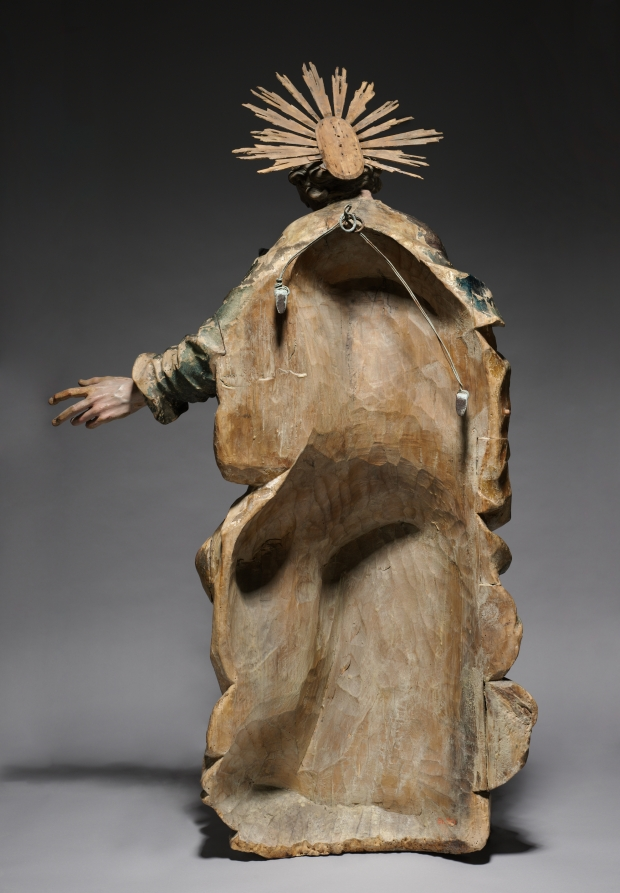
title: God the Father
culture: Austria, Lambach, 18th century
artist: Johann Peter Schwanthaler (Austrian, 1720–1795)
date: c. 1760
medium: painted and gilded wood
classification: Sculpture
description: Johann Peter Schwanthaler belonged to a renowned family of sculptors that produced works for religious and domestic settings throughout Bavaria, Austria, and southern Germany for more than 250 years. This imposing image of God the Father would have formed part of a larger group, probably at the top of an altar. The figure displays the characteristic features of Schwanthaler’s style, such as the elongated figural proportions, sharp-edged drapery folds, and the beautifully expressive, anatomically detailed hands.